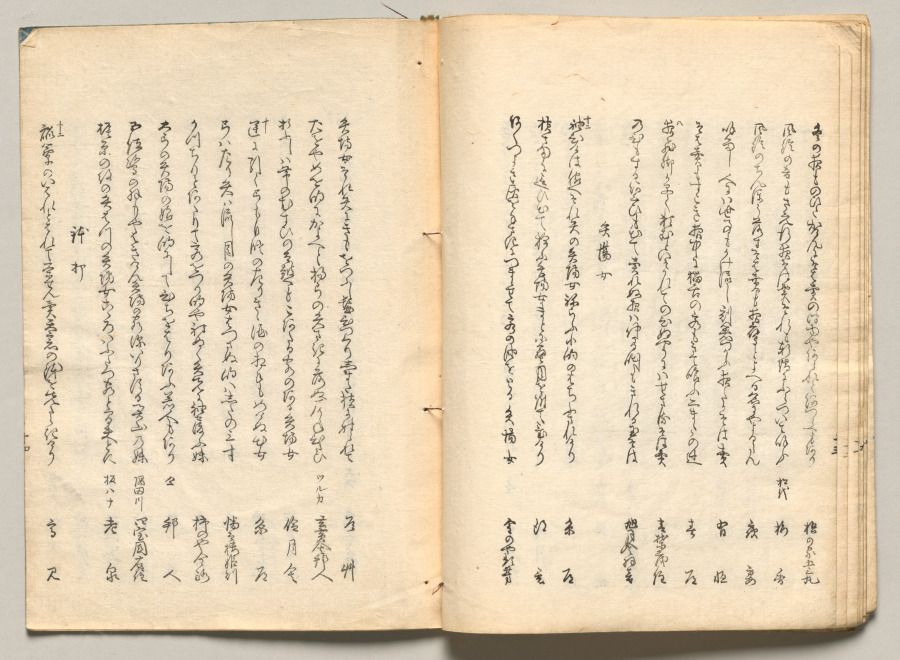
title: Spread Twenty-Two from Volume Four of People of Japan in Light Verse (Kyōka)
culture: Japan, Edo period (1615–1868)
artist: Utagawa Hiroshige (Japanese, 1797–1858)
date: 1857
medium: Woodblock-printed book; ink and color on paper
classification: Bound Volume